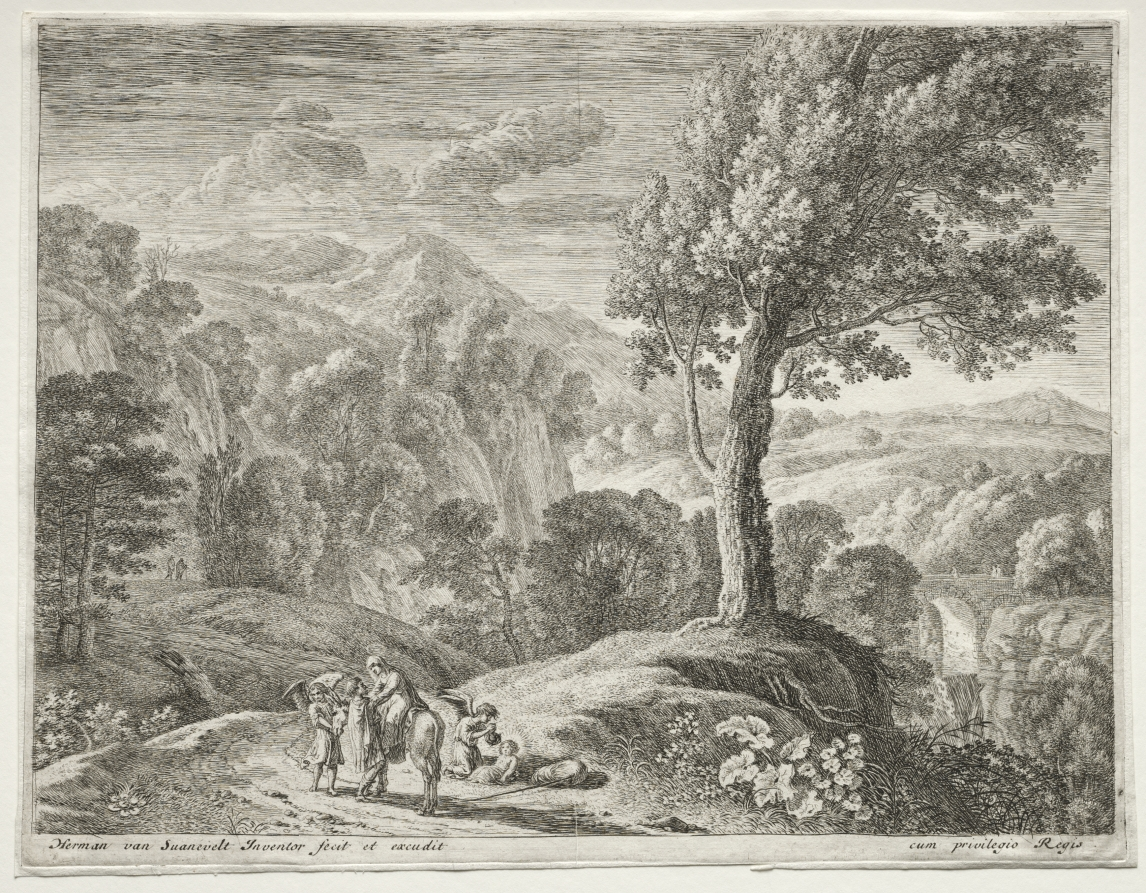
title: The Large Tree and the Cascade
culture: Netherlands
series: The Flight into Egypt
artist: Herman van Swanevelt (Dutch, c. 1600–1655)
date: c. 1652–54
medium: etching and engraving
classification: Print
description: This series by Herman Swanevelt, The Flight into Egypt, illustrates an event from the New Testament of the Bible. Joseph, Mary, and Christ fled into Egypt to escape King Herod's persecution. Traditionally represented as a single image, Swanevelt enlarged the story into four scenes. The Holy family is first shown traveling with three angels behind them, then Joseph helps Mary off the donkey, next Joseph leads the donkey to water as Mary changes the child, and finally the family is at rest. However, the main focus of each of these prints is the depiction of landscape, a genre that reached unprecedented levels of popularity during the 1600s. The scenery, looking much more like the Italian countryside than Egypt, was inspired by Swanevelt's paintings. Although he was Dutch, he spent most of his career in Paris and Rome. As a painter, he was known for his ability to convey warm, glowing sunlight, a quality also found in his etchings.